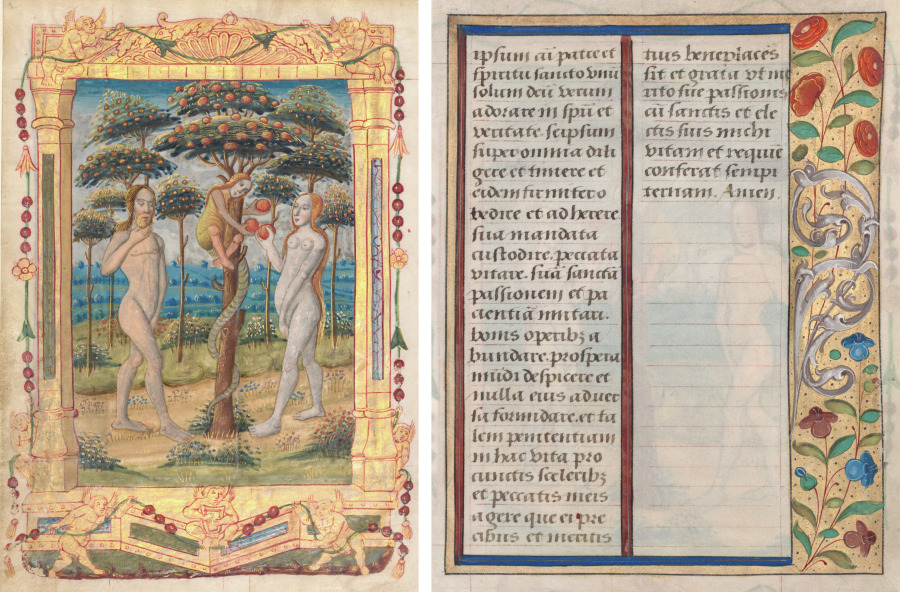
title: Leaf from a Book of Hours: Adam and Eve and the Fall of Man (Prefatory Miniature to the Office of the Virgin) (recto) and Text with Illustrated Border (verso) (1 of 3 Excised Leaves)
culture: France, Rouen, 16th century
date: c. 1510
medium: ink, tempera, and liquid gold on vellum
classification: Manuscript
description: This leaf came from a highly customized and lavish book of hours made in Rouen, a major center for book production at the time. Intended for a female patron, the book, of which the museum owns three leaves, contained numerous illuminations. Shown here are Adam and Eve, the first man and woman, just before disobeying God by eating fruit from the forbidden tree of knowledge in the Garden of Eden, considered the first sin in Christianity. This precedes the Hours of the Virgin’s traditional first scene of the Annunciation. Its inclusion emphasizes a need for redemption through recitation of the subsequent prayers.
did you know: This image opens to what is the heart of every book of hours, the Hours of the Virgin, a set of prayers in which the reader asked the Virgin Mary to intercede on their behalf.